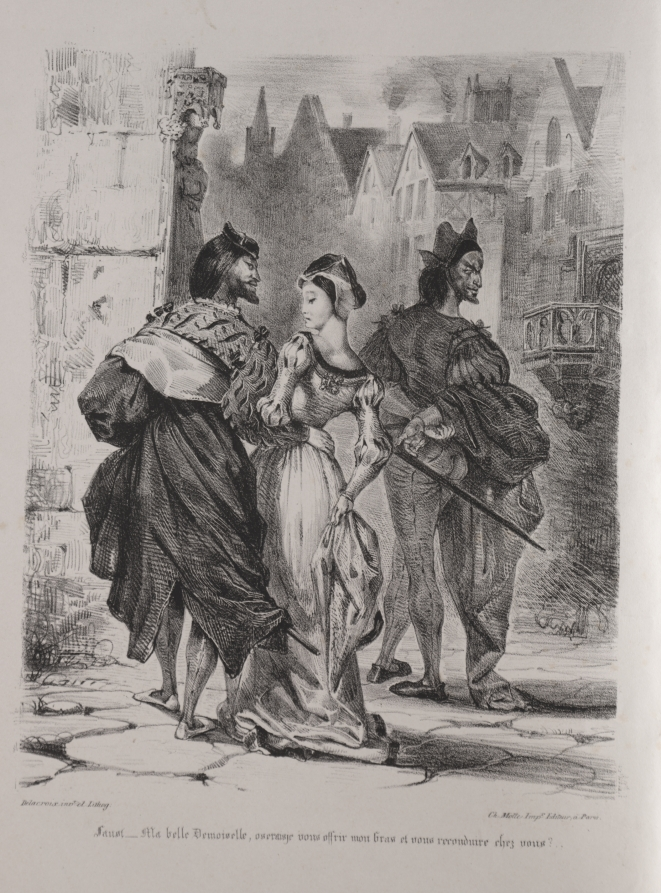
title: Illustrations for Faust: Faust seeks to allure Marguerite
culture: France, 19th century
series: Faust: Tragédie de M. de Goethe, translated into French by Albert Stapfer.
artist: Eugène Delacroix (French, 1798–1863)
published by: Chez Ch. Motte, Éditeur, distributed by Chez Sautelet, Libraire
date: 1828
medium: lithograph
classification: Print